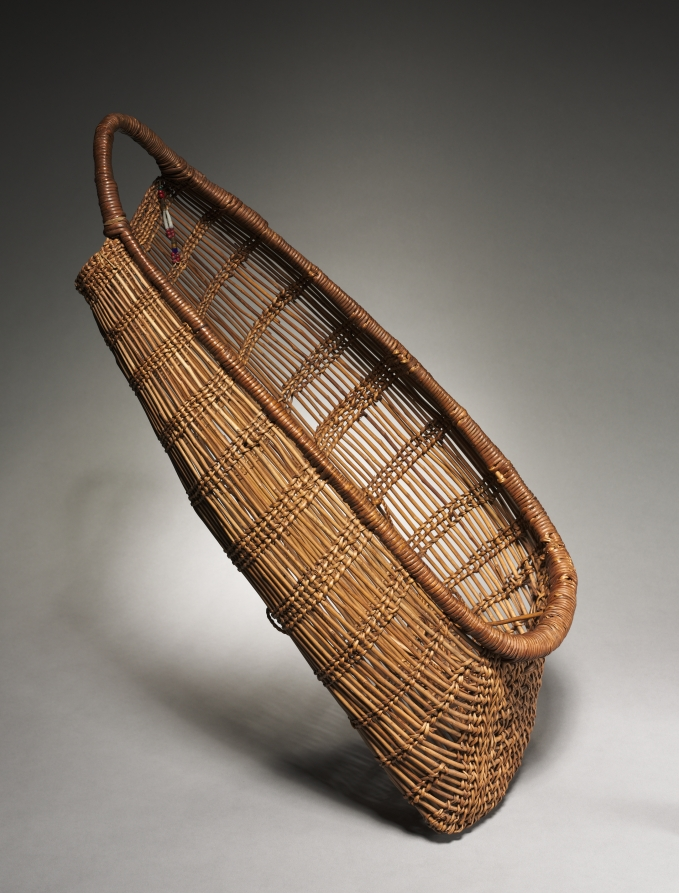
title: Cradle Basket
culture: California, Yurok or Hupa, Late 19th century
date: c 1875– 1910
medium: twined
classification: Basketry